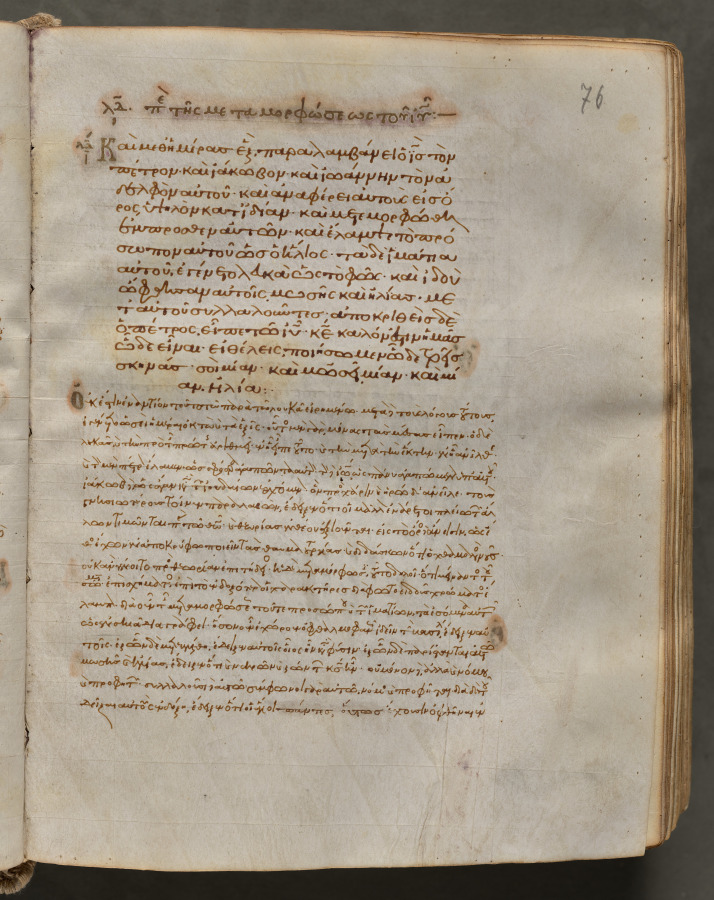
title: Text, folio 76 (recto), from a Gospel Book with Commentaries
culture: Byzantium, Constantinople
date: c. 1000–1100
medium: ink, tempera, and gold on vellum; leather binding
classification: Bound Volume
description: Each of the four gospels in this book opens on a page with brilliantly illuminated borders depicting the author of the text as well as birds-principally peacocks, symbols of the immortality of the soul-and fountains, representing the fountain of life and the salvation of the soul. This volume consists of 428 leaves with texts in Greek. Its level of sophistication suggests that it was probably written and decorated in a monastery in Constantinople.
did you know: Gospel Books were carried in procession through Byzantine churches.